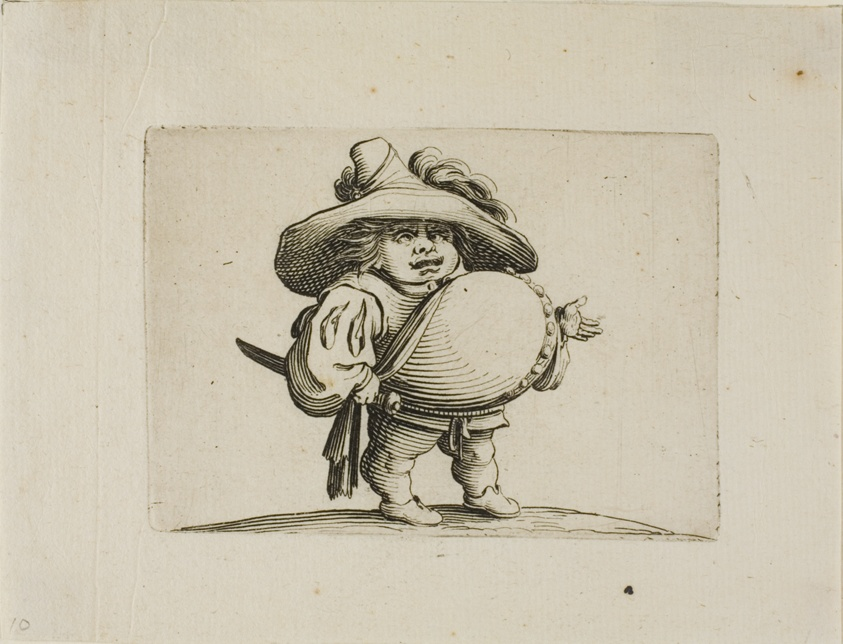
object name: Print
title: The Large Bellied Man Decorated with a Line of Buttons, from Varie Figure Gobbi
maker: Jacques Callot (French, 1592-1635)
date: 1616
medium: Etching on paper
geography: France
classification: etching; print; prints and drawing